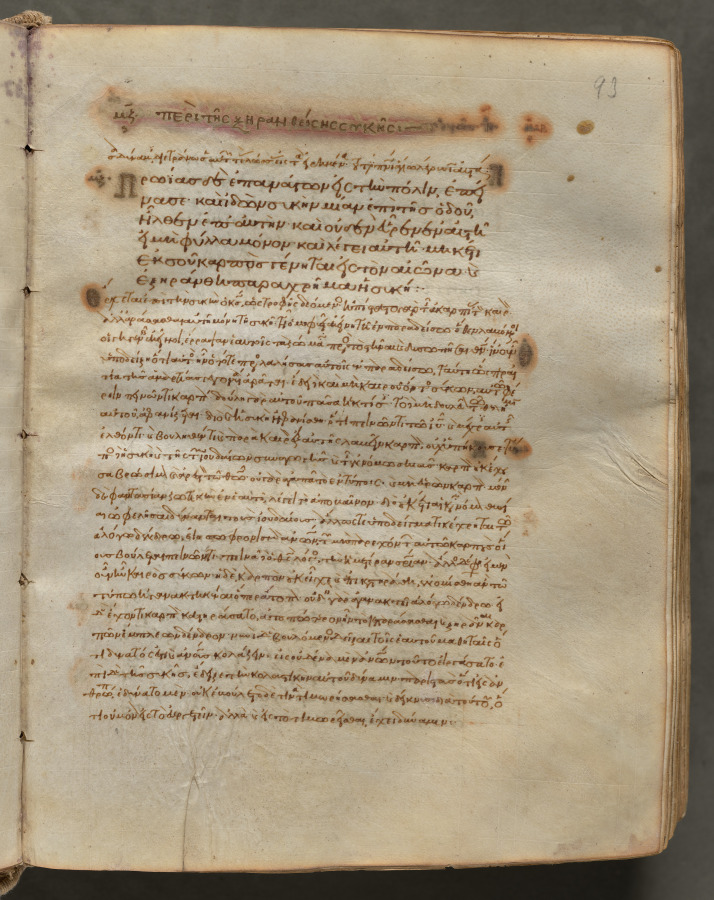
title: Text, folio 93 (recto), from a Gospel Book with Commentaries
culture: Byzantium, Constantinople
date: c. 1000–1100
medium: ink, tempera, and gold on vellum; leather binding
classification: Bound Volume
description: Each of the four gospels in this book opens on a page with brilliantly illuminated borders depicting the author of the text as well as birds-principally peacocks, symbols of the immortality of the soul-and fountains, representing the fountain of life and the salvation of the soul. This volume consists of 428 leaves with texts in Greek. Its level of sophistication suggests that it was probably written and decorated in a monastery in Constantinople.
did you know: Gospel Books were carried in procession through Byzantine churches.